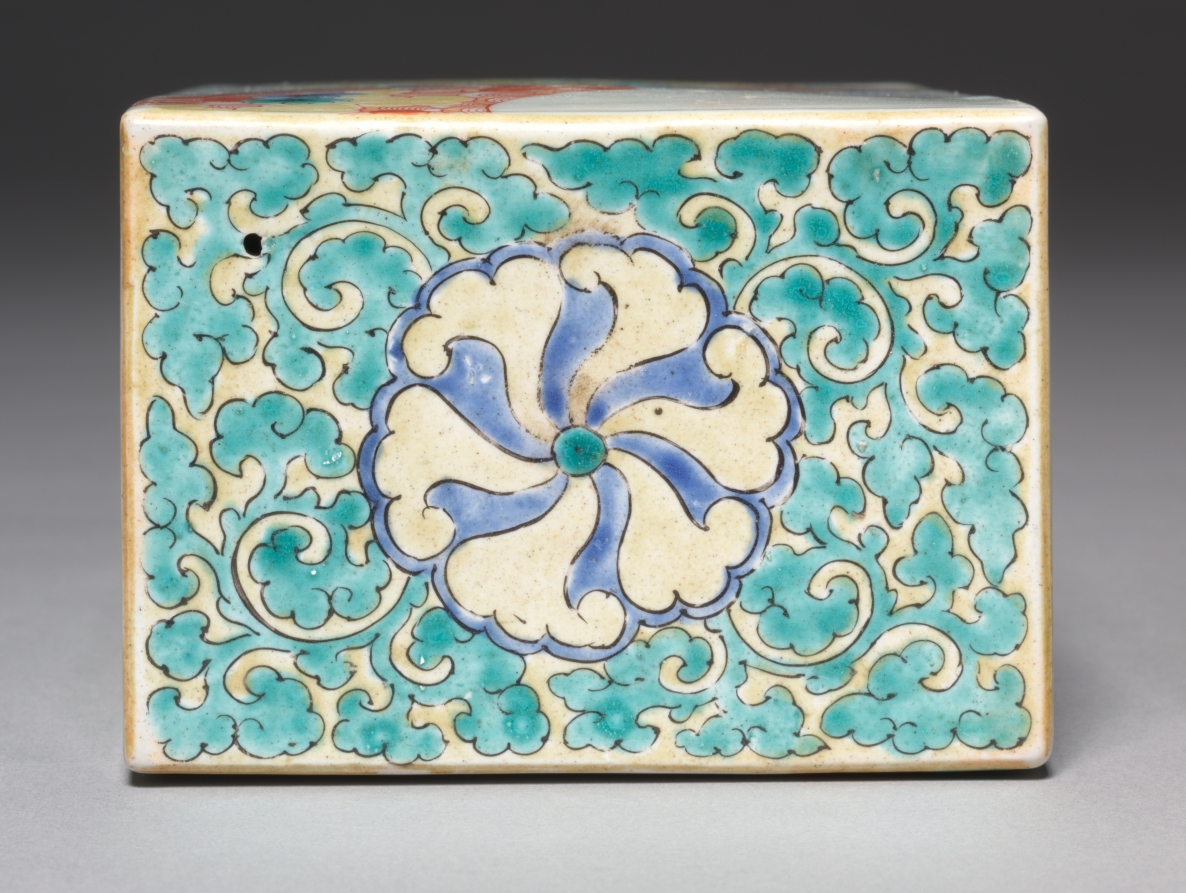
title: Pillow with Fan and Floral Decoration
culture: Japan, Edo period (1615–1868)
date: late 1600s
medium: porcelain with overglaze color enamel (Hizen ware, Kakiemon type)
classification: Ceramic